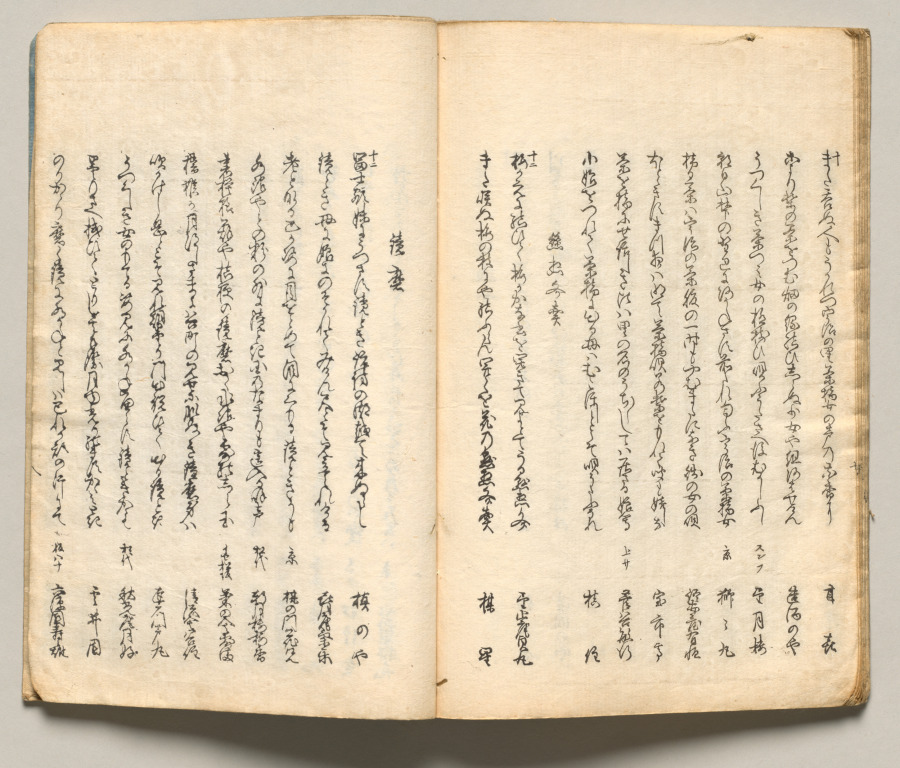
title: Spread Sixteen from Volume Seven of People of Japan in Light Verse (Kyōka)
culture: Japan, Edo period (1615–1868)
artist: Utagawa Hiroshige (Japanese, 1797–1858)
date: 1857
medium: Woodblock-printed book; ink and color on paper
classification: Bound Volume